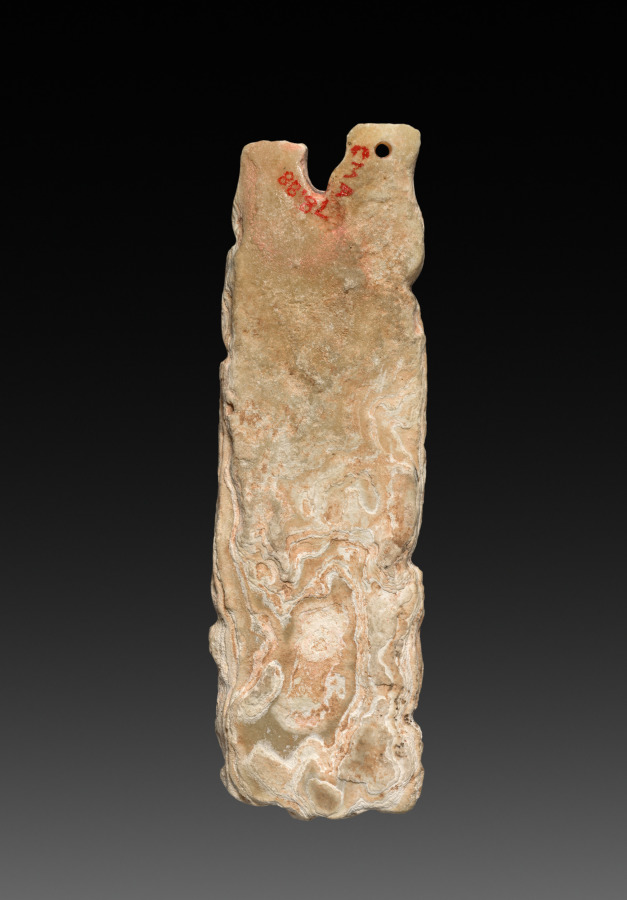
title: Plaque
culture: China, Western Zhou dynasty (c. 1046–771 BCE)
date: c. 1000–900 BCE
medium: calcite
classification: Jade